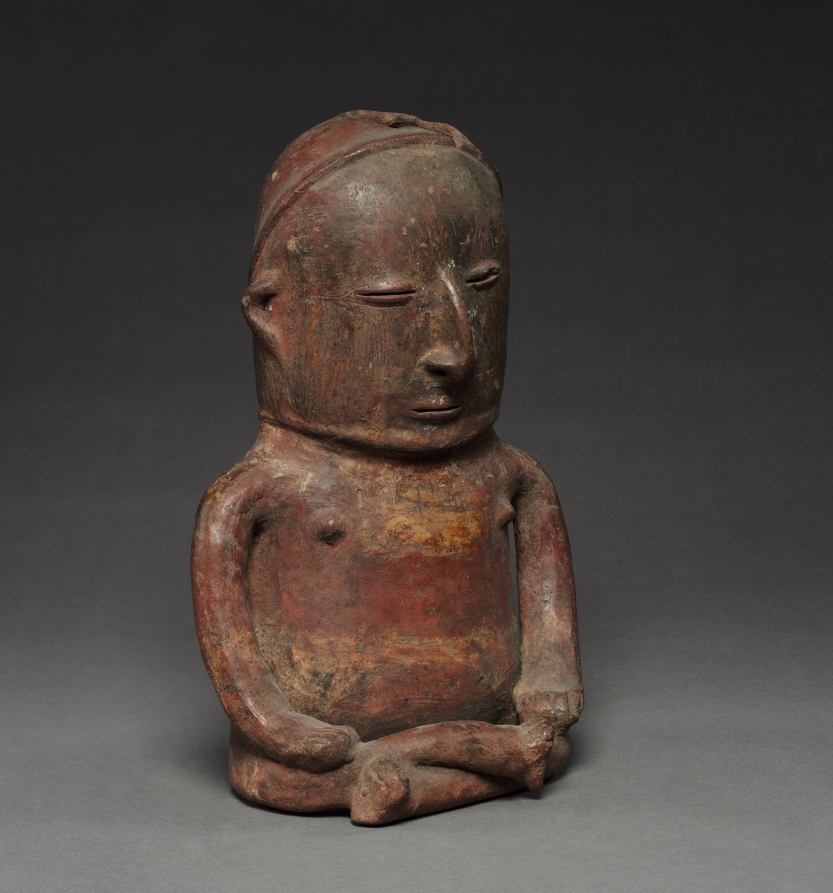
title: Seated Figure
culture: Colombia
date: before 1921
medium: red ware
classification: Ceramic